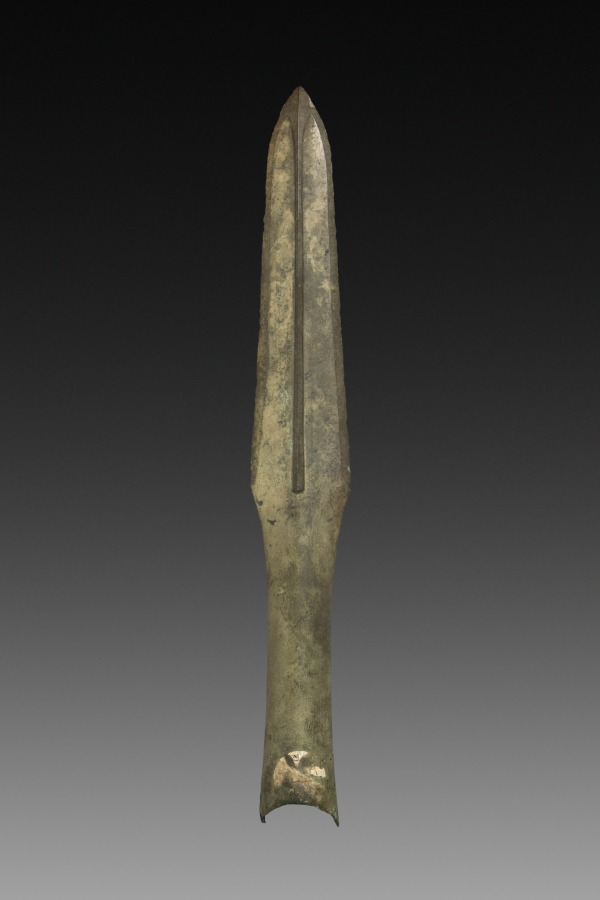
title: Spear Point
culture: China, Zhou dynasty (c. 1046–256 BCE)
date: 1045–256 BCE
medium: bronze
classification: Arms and Armor